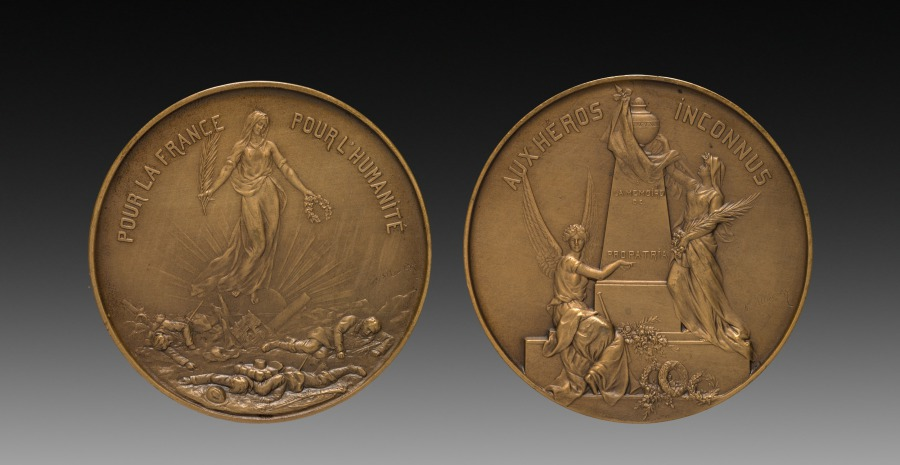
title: Medallion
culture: France, 19th-20th century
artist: Henri Emile Allouard (French, 1844–1929)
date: 1917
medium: bronze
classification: Metalwork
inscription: "Aux héros inconnus. À la memoire de . . . pro patria."